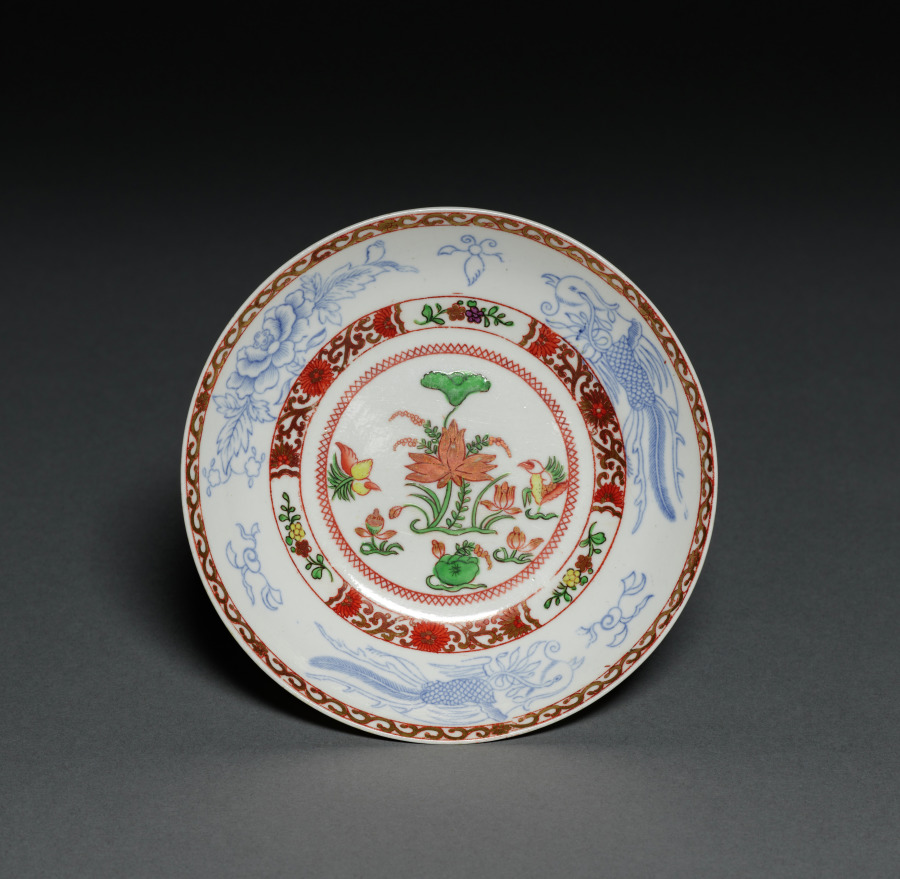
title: Saucer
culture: England, Staffordshire, 18th-19th century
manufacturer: Spode Factory (British)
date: 1700s-1800s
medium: porcelain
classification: Ceramic